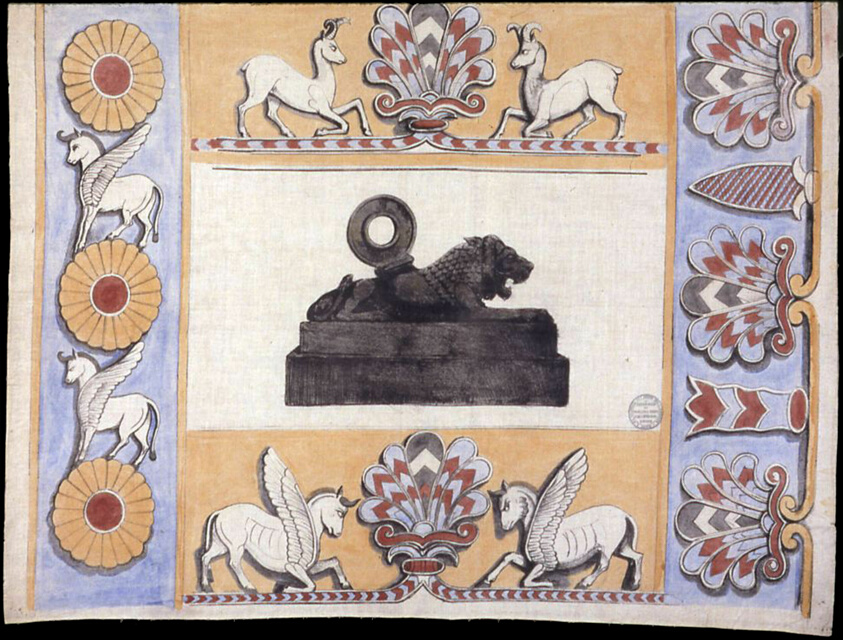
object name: Textile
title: Panel (Furnishing Fabric)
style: egyptian revival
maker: England, London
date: 1852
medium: Cotton, plain weave; painted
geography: London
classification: textile; weaving - printed; furnishing textile